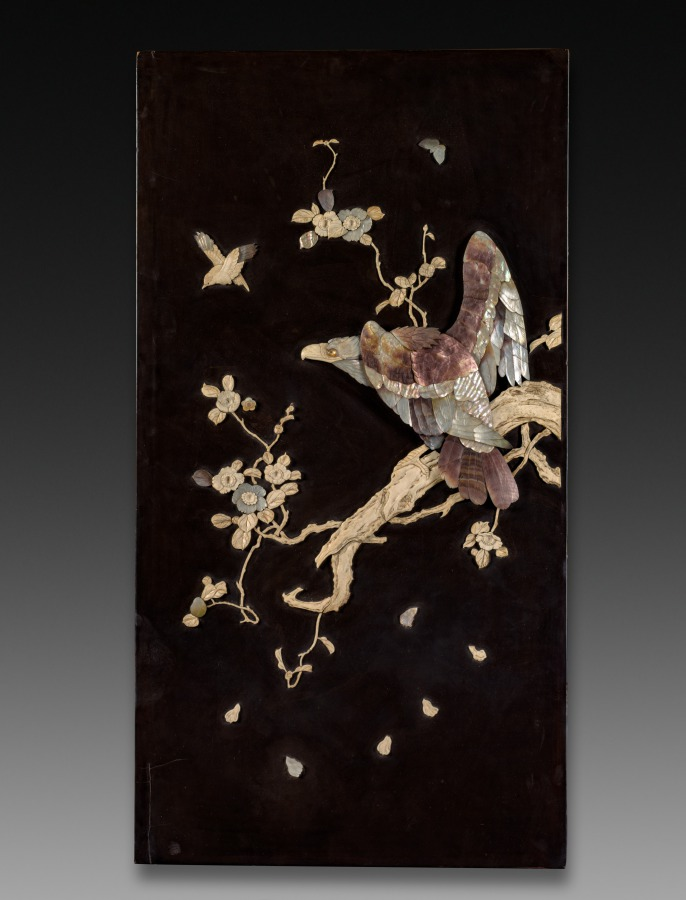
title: Decorative Panel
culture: Japan, Edo period (1615–1868) to Meiji period (1868–1912)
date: 1800s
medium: lacquer with ivory inlays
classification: Lacquer